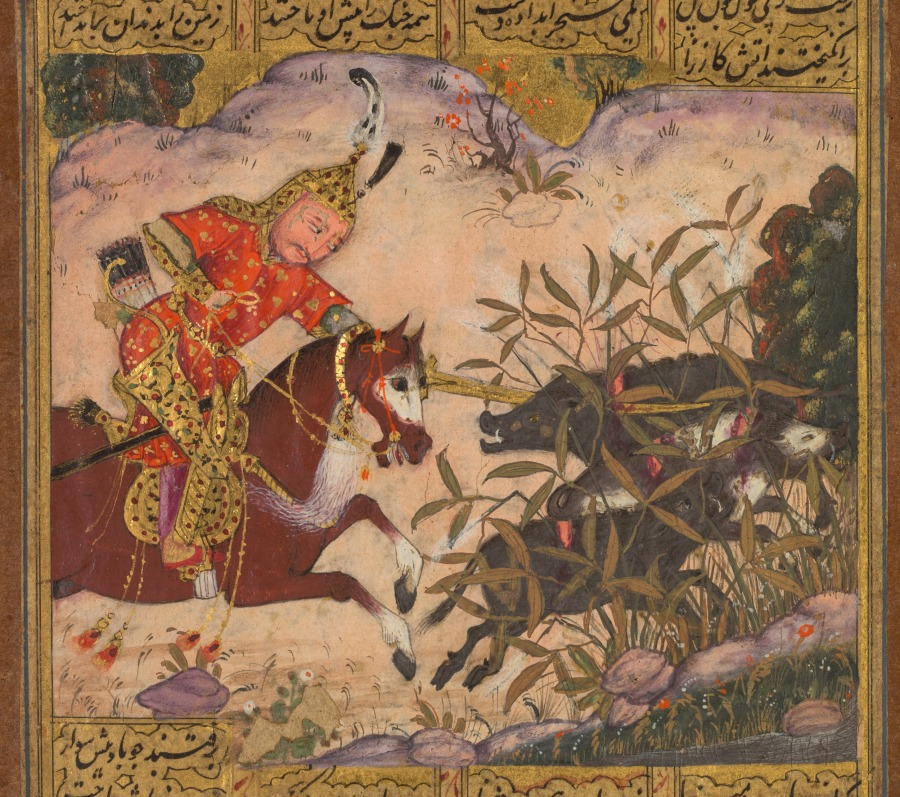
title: Bijan killing the wild boars of Irman, from a Shah-nama (Book of Kings) of Firdausi (Persian, about 934–1020) (verso)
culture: India, Bijapur, Deccan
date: c. 1610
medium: Gum tempera, ink, and gold on paper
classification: Painting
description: This illustrated page from a Shah-nama depicts the first adventure of the hero Bijan, son of an Iranian knight. When reports arrived at the king’s court of wild boars ravaging the borderlands between the enemy realms of Iran and Turan, Bijan volunteered to hunt and kill the beasts, much to the chagrin of his father, who doubted his young son’s ability to navigate the politically volatile situation. The fearless Bijan is shown on horseback as he singlehandedly strikes the bodies of the boars in the brush. After overzealously celebrating his success, Bijan must be rescued from a pit by Rustam. This early manuscript from the Deccan made for the sultan of Bijapur is characterized by glowing colors and lavish use of gold.